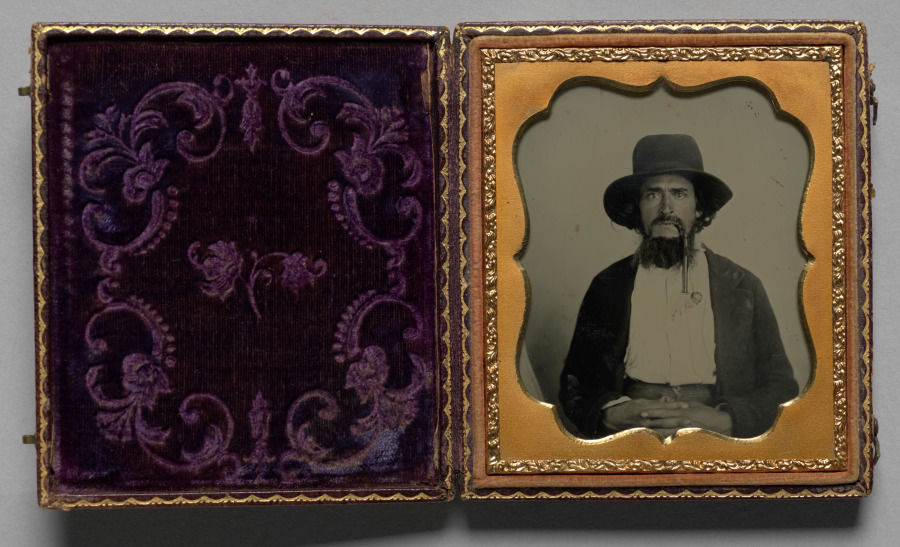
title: Urban Worker Smoking Tyrolean Pipe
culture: America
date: c. 1855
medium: ambrotype, sixth plate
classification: Photograph